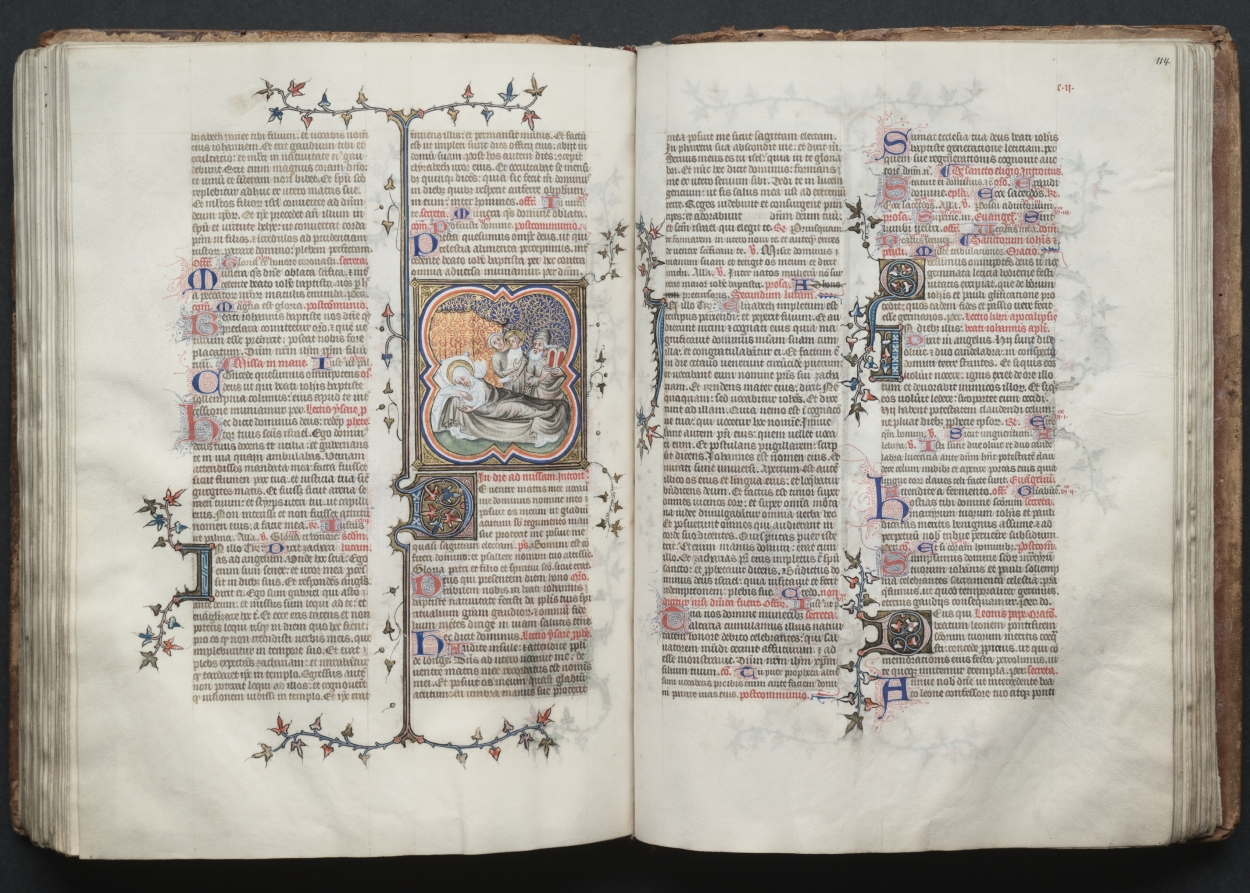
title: The Gotha Missal: Fol. 113v, The Birth of John the Baptist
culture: France, Paris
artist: Master of the Boqueteaux (French)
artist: and Workshop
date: c. 1375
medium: ink, tempera, and gold on vellum; blind-tooled leather binding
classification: Bound Volume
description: The style and quality of this manuscript's decoration is typical of deluxe Parisian books made for aristocratic or royal patrons. Most of the book's decoration appears to be the work of the Master of the Boqueteaux, an artist active at the court of King Charles V (died 1380). His style was apparently shared by a number of book illuminators working in and around Paris. It is very possible that the Gotha Missal belonged to Charles V, but is not provable because the manuscript has no royal portraits and lacks a colophon. Given the book's magnificent decoration, however, it would seem that it was produced for a Valois prince, if not for the king himself. The manuscript receives its name from the German dukes of Gotha, its later owners.